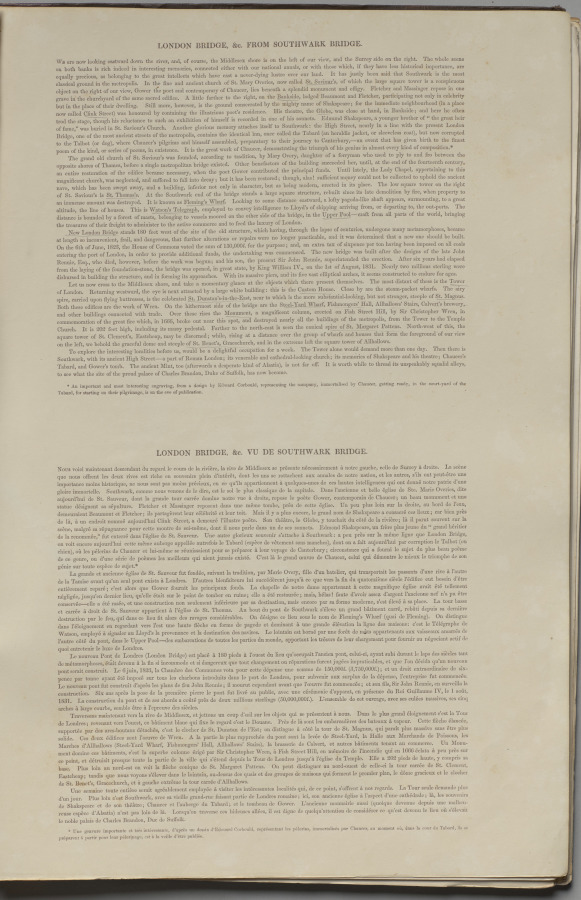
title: London As It Is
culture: England, 19th century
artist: Thomas Shotter Boys (British, 1803–1874)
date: 1842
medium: lithograph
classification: Bound Volume